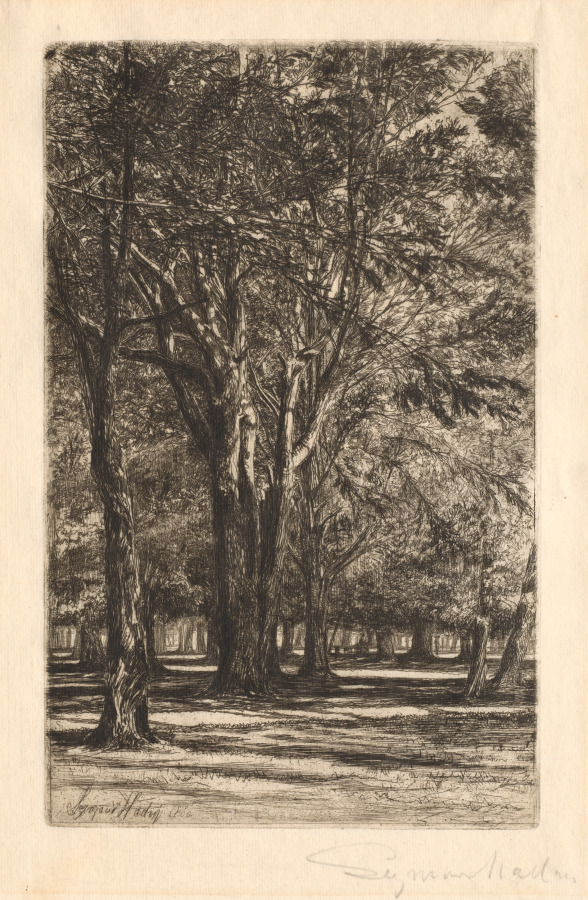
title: Kensington Gardens, No. 2 (Large Plate)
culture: England, 19th century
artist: Francis Seymour Haden (British, 1818–1910)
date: 1860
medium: etching and drypoint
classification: Print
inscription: Lower right, in graphite Seymour Haden 1860